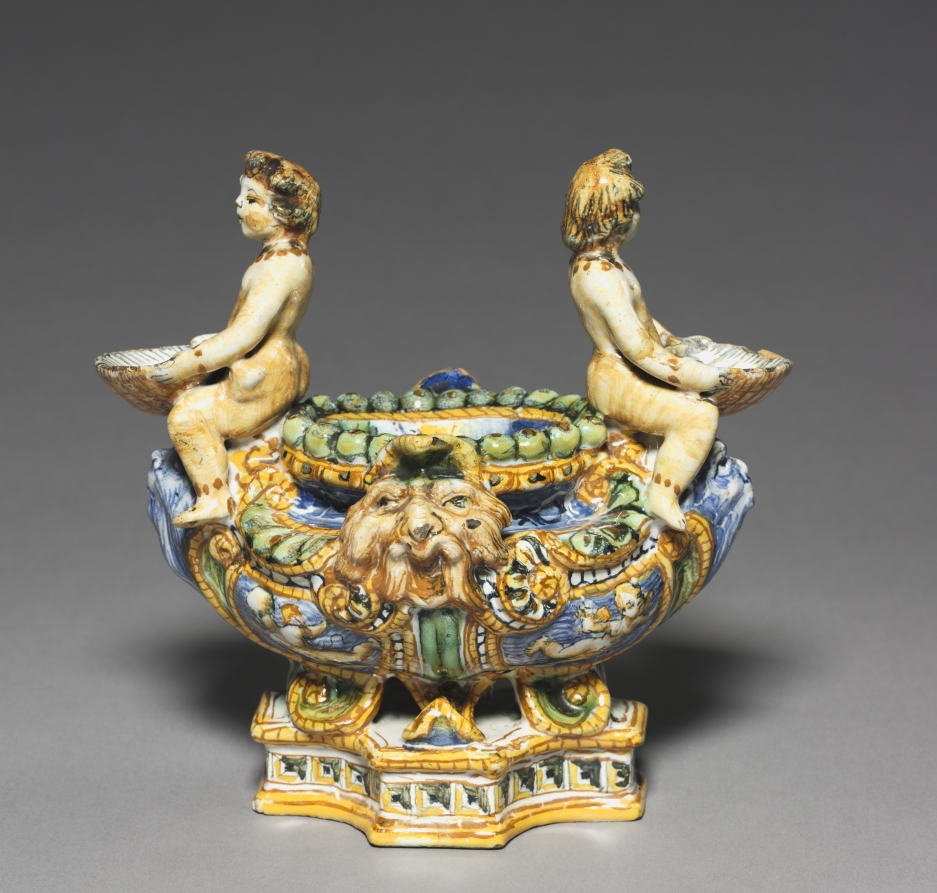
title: Saltcellar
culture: Italy, Urbino, 16th century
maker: circle of the Patanazzi Family (Italian)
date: c. 1570–90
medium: tin-glazed earthenware (maiolica)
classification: Ceramic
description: During the Italian Renaissance of the 1400s and 1500s, nobles and merchants eager to express their wealth and sophistication ordered ceramics for dining, display, and storage. Known as maiolica, because it resembled the brightly colored ceramics from the Mediterranean island of Majorca, these ceramic vessels were covered with a tin glaze that provided an opaque white surface on which colorful decoration could be painted.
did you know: During the Renaissance, salt was an expensive commodity and was used to both season and preserve food.